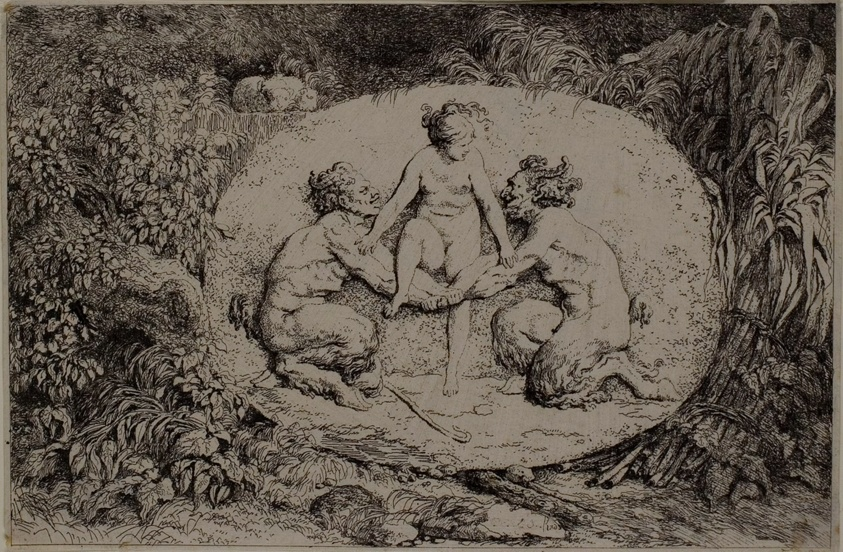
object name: Print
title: Nymph Sitting on the Hands of Two Satyrs from Bacchanales, or Satyrs' Games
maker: Jean-Honoré Fragonard; French, 1732-1806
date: 1763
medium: Etching on ivory laid paper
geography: France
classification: etching; print; prints and drawing